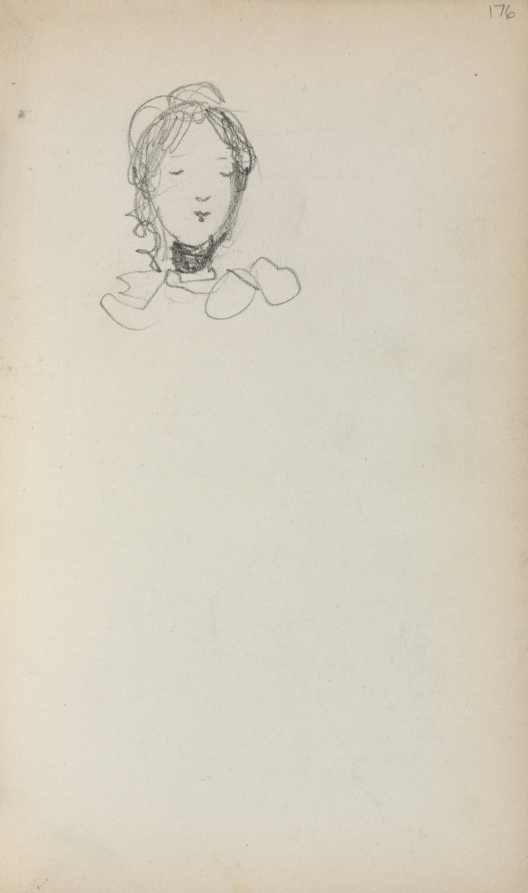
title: Italian Sketchbook: Head of a Girl (page 176)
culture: America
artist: Maurice Prendergast (American, born Newfoundland [now Canada], 1858–1924)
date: 1898–1899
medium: pencil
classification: Bound Volume